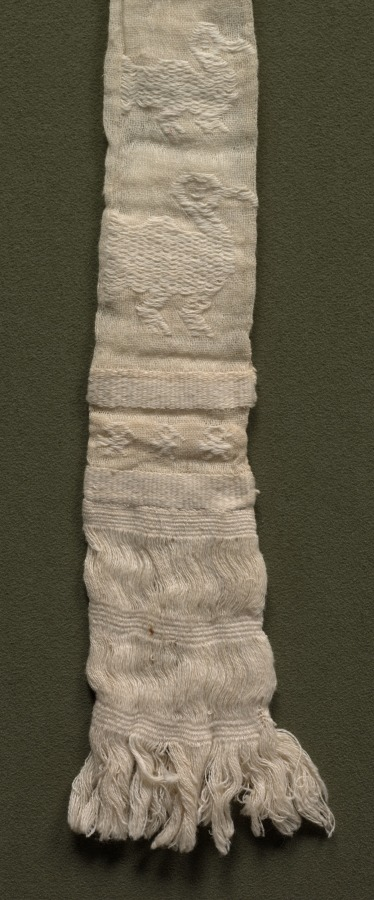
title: Padded Hat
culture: Peru, North Coast, Chimú style, 1200-1460s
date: 1460–1625 (radiocarbon date, 95.4% probability)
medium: cotton; plain weave, brocaded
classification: Garment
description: This garment may have been found with others in the collection that formed a matched set worn by a noble of the Chimú, who rose to power on Peru’s north coast after 1000 AD.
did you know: The Chimú forged an empire that thrived until the 1460s, when the Inka incorporated it into their own imperial domain.